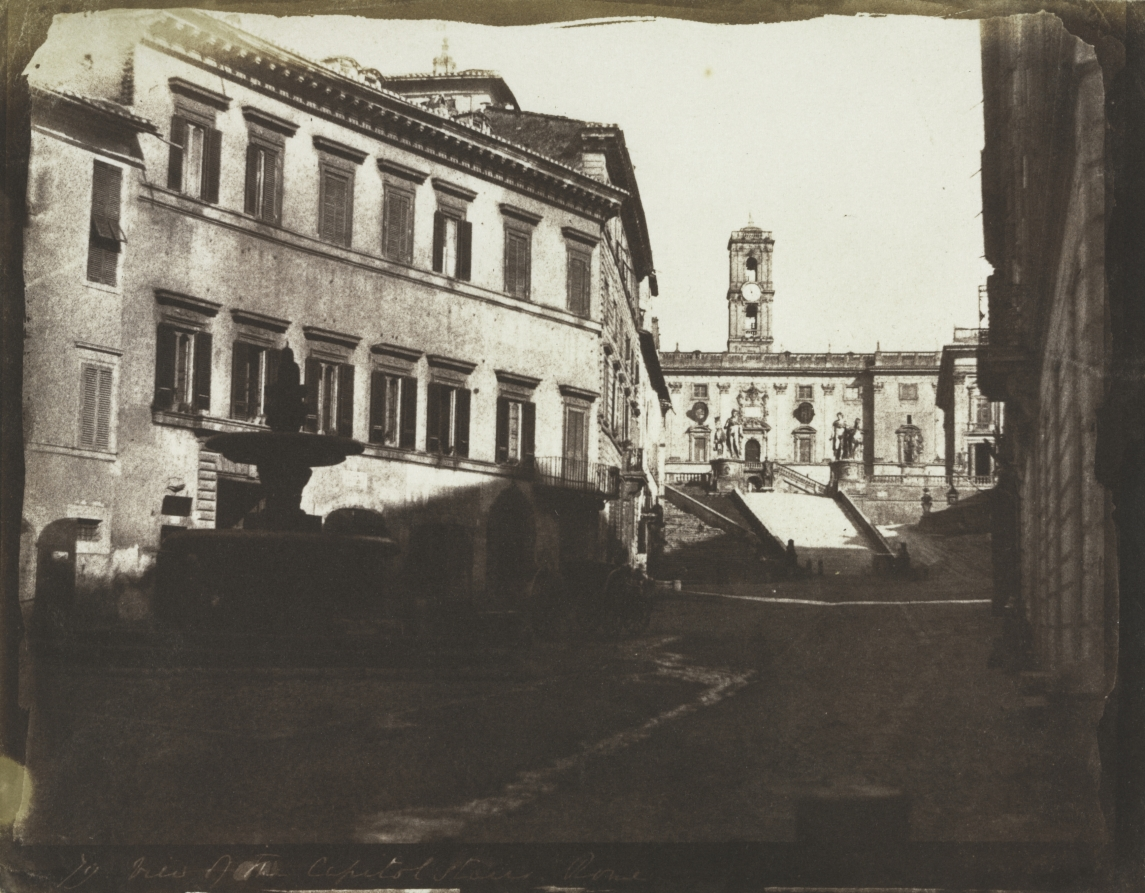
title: View of the Capitol Stairs, Rome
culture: England, 19th century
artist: Calvert Richard Jones (British, 1804–1877)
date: 1846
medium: salted paper print from calotype negative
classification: Photograph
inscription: Written in negative: "19(?). View of the Capitol Stairs. Rome."; written in graphite on verso: "Rome/x2667"; in black ink on verso: "LA396"